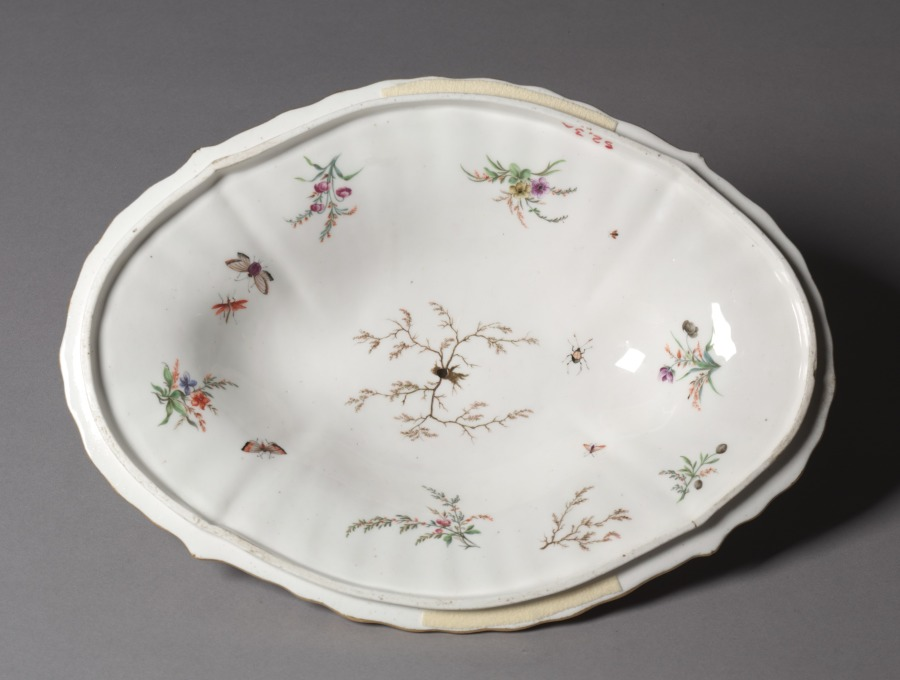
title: Cover for a Tureen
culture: France, Vincennes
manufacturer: Vincennes Porcelain Factory (France, 1740–56)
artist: probably painted by Louis-Denis Armand (French, active c. 1745–1783)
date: c. 1752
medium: soft-paste porcelain wth enamel and gilt decoraion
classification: Ceramic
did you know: This object was manufactured in soft-paste porcelain, a material used by many European porcelain factories before they were able to emulate the hard-paste porcelain of China and Japan.